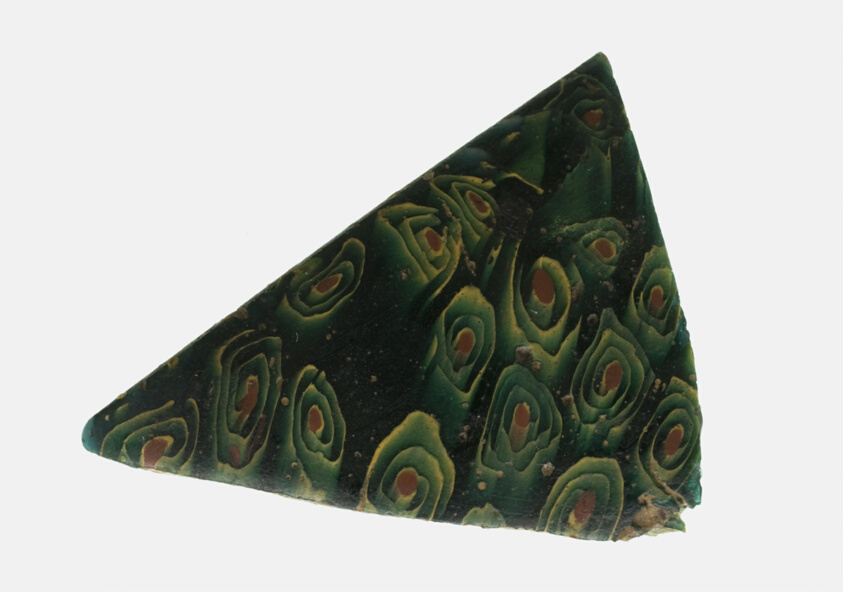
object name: Decorative Arts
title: Fragment of a Bowl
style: roman (ancient, style or period), ancient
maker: Roman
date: 1st century BCE–1st century CE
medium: Glass, mosaic glass technique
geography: Italy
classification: fragment; decorative arts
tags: decoration